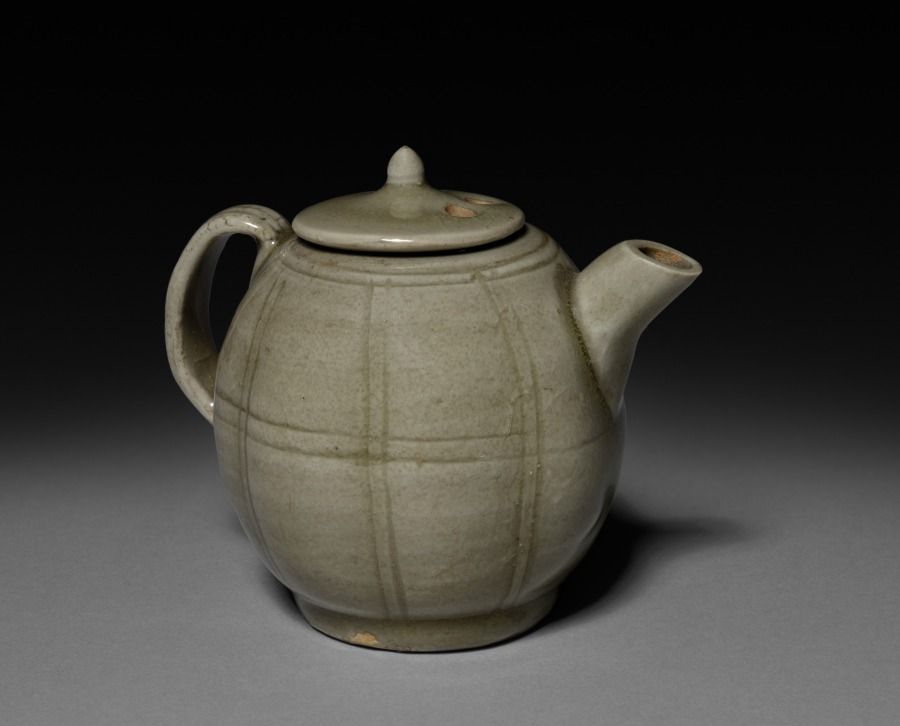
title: Wine Pot: Southern Celadon Ware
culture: China, Southern Song Dynasty (1127-1279) - Yuan Dynasty (1271-1368)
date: 1200s-1300s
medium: glazed porcelain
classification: Ceramic